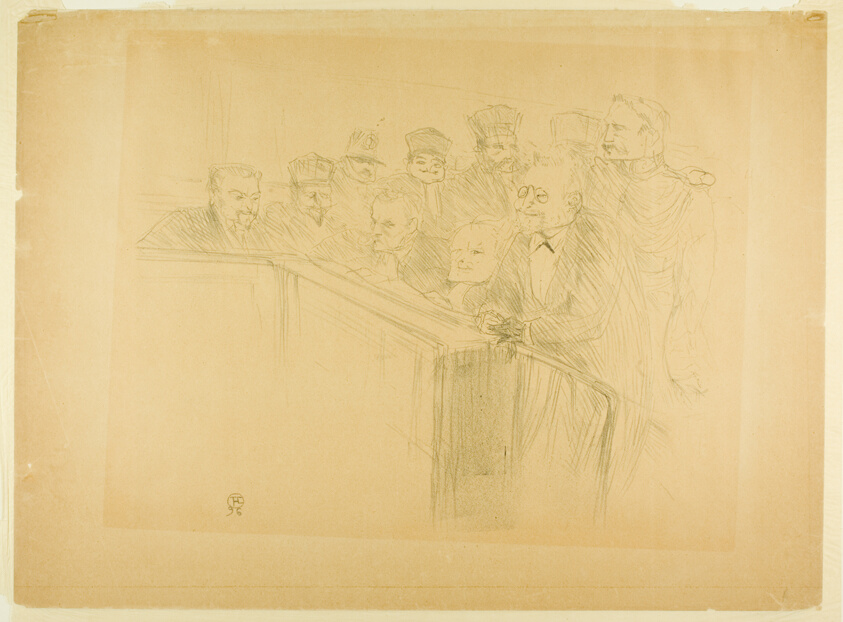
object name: Print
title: The Arton Trial (first plate)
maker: Henri de Toulouse-Lautrec (French, 1864-1901)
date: 1896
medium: Lithograph on tan wove paper, laid down on cream Japan tissue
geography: France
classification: lithograph; print; prints and drawing